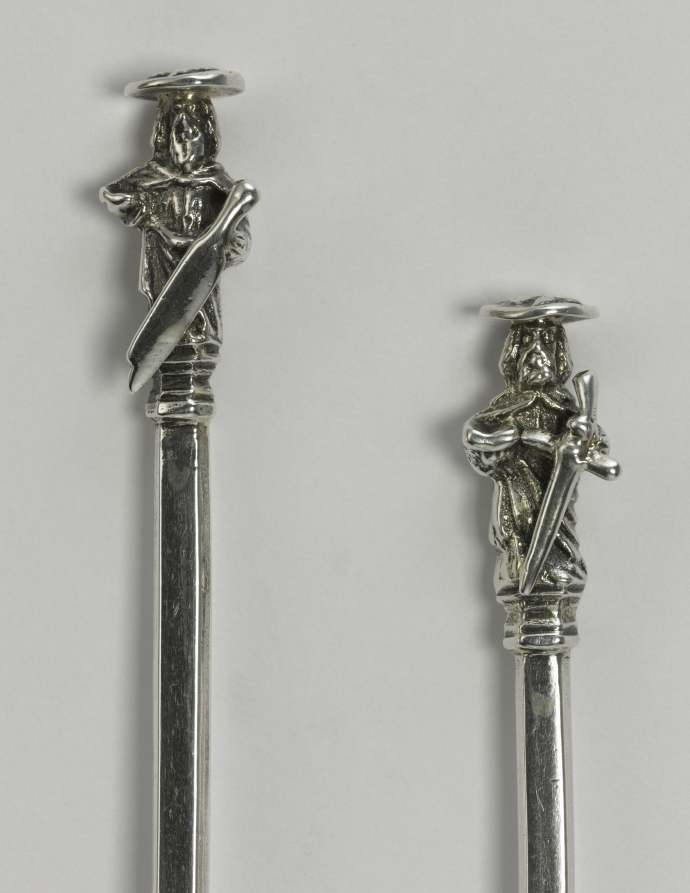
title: Saint Paul Spoon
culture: England, London, 17th century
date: 1622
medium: silver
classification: Silver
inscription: pricked on back of bowl: "R H."